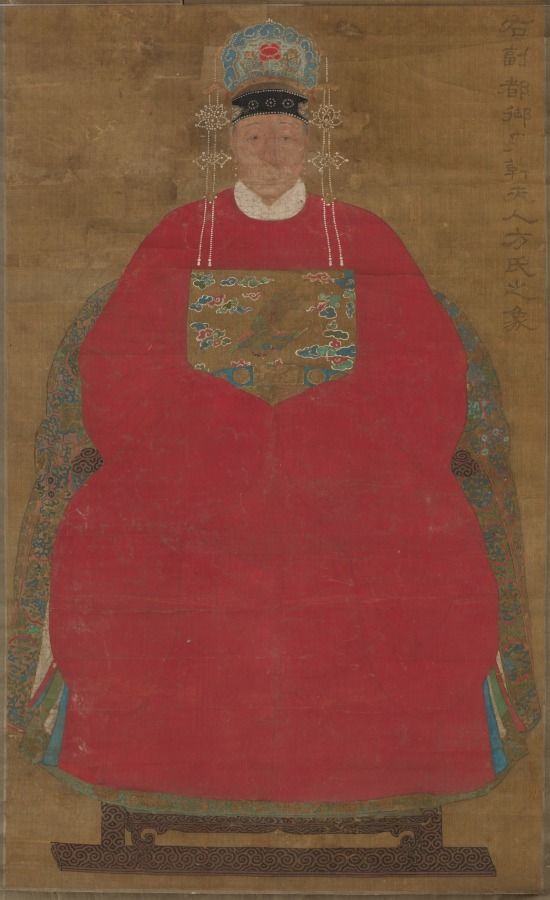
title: Madam Han Neefang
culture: China, Ming dynasty (1368–1644)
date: 1368–1644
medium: hanging scroll, ink and color on silk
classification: Painting